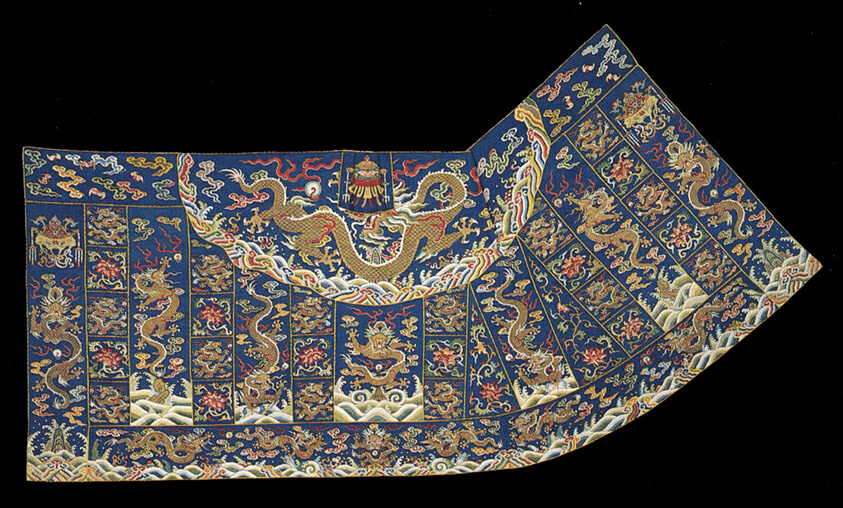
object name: Textile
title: Jiasha (Mantle)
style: qing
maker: Han-Chinese (China)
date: Qing dynasty (1644–1911), 1700/50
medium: Silk and gold-leaf-over-lacquered-paper-strip-wrapped silk, slit tapestry weave with interlaced outlining wefts; pieced; painted details; edged with silk, warp-float faced 4:1 satin weave; lined with silk, plain weave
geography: China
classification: textile; weaving